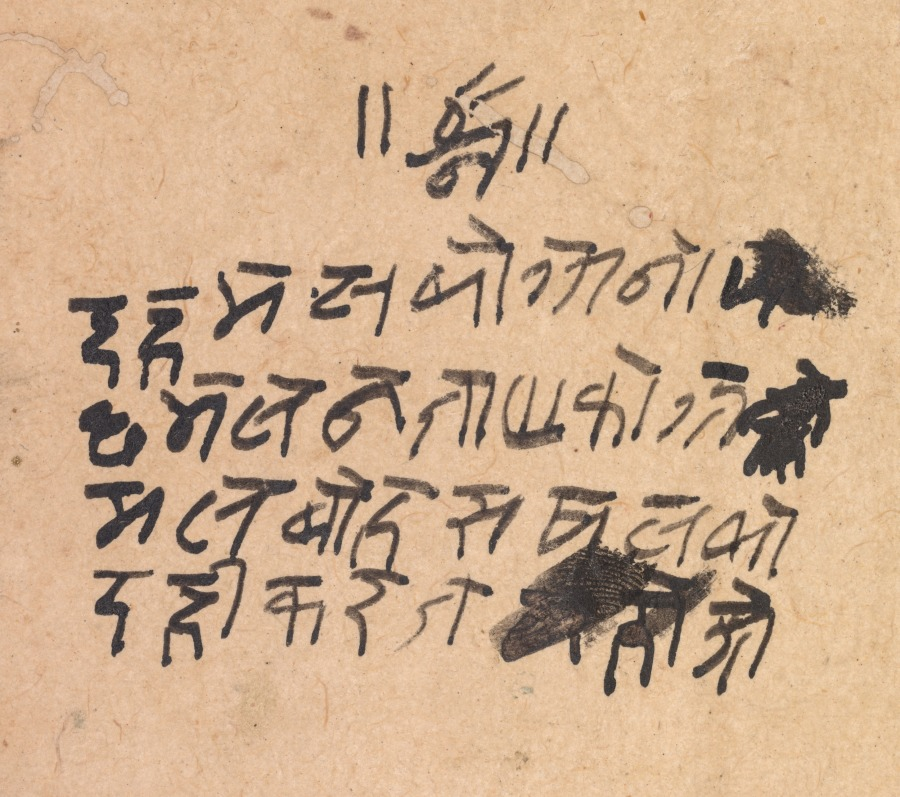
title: Calligraphy: Preface to the Anvar-i Suhaili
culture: Northern India, Mughal court, 16th century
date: c. 1590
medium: Gum tempera, ink, and gold on paper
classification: Calligraphy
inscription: Banyavati inscription in Devenagari script in left margin describing the subject of the miniature: 'We failed to understand each other when we were together, the understanding in that respect may come to us on being separated".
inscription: Persian text in nasta‘liq script: . . . and he also added illustrations and decorations and in truth an album was arranged that ever since the visage of rosy-cheeked beauties has been bedecked by their black sweet-smelling tresses, the like of the calligraphic lines that are written upon it have never been set upon any paper by a pen, and ever since the album of the sky has been illuminated by the luminosity of the moon and the sun, the light of the understanding . . .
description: The lovers have met in a remote wilderness location, away from the city shown in the distance. However, their affair has run its course, and they decide to part ways, each walking in opposite directions through an ominous landscape, where strange rock formations and an oversized serpent-slain by foxes gnawing on its innards-lend a sense of foreboding. As Mughal court painting developed into the last decades of the 16th century, artists began using increasingly muted colors and gentler shading techniques than they did in the more robust Adventures of Hamza at the left. The omission of a light source and shadows adds to a timeless, otherworldly impression to the landscape.